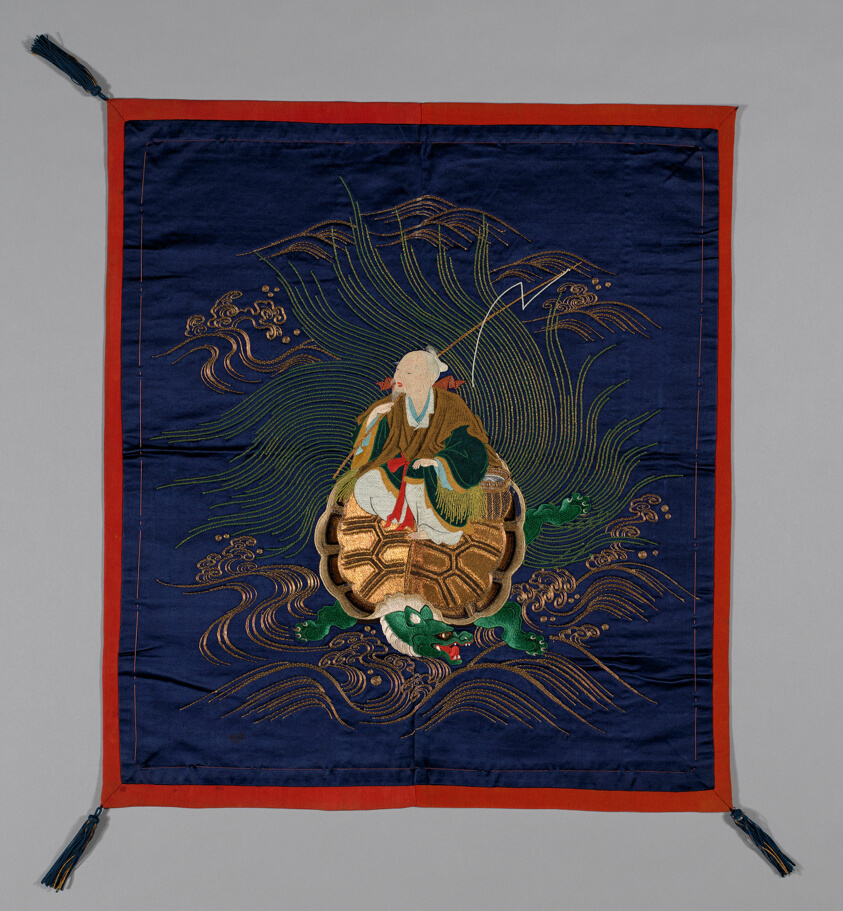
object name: Textile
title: Fukusa (Gift Cover)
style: meiji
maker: Japan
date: Meiji period (1868–1912), late 19th century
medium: Embroidered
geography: Japan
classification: textile; weaving; liturgical - buddhist